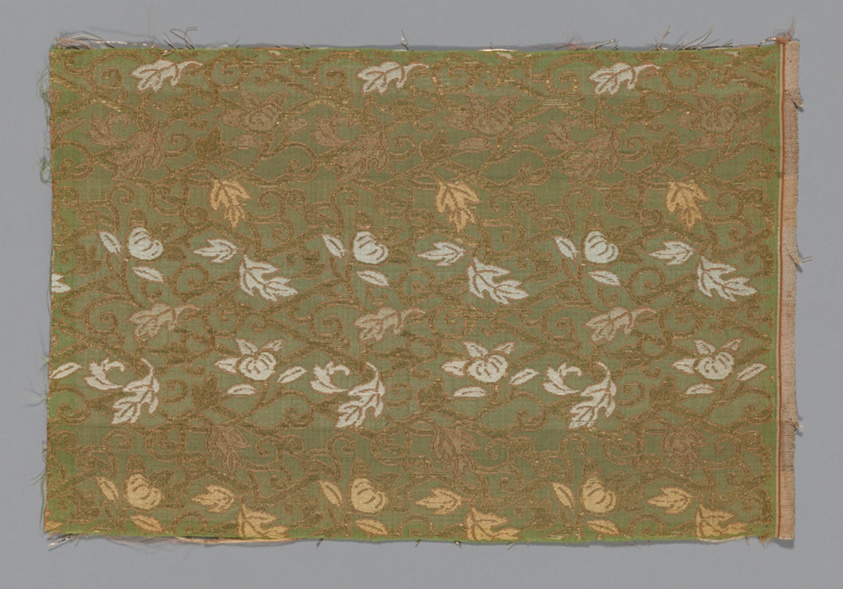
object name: Textile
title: Fragment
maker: Japan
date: Edo period (1615–1868), 1750/1800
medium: Fancy compound satin silk and gilt paper; 2 strips to m.m.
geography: Japan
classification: weaving; textile